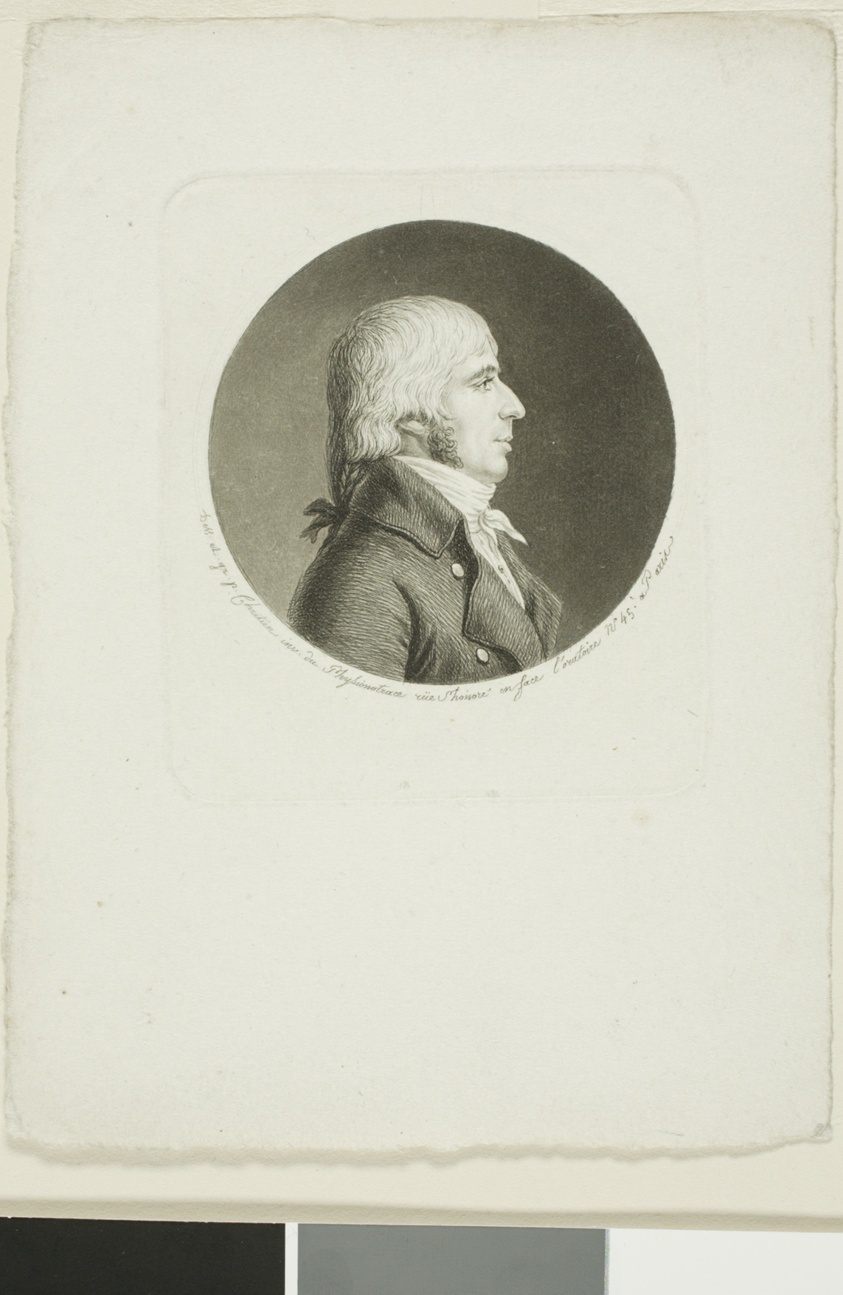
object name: Print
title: Portrait of a Man with White Hair in a Pigtail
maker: Giles Louis Chrétien; French, 1754-1811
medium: Etching with roulette and aquatint, over physionotrace, on ivory wove paper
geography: France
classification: etching; print; prints and drawing